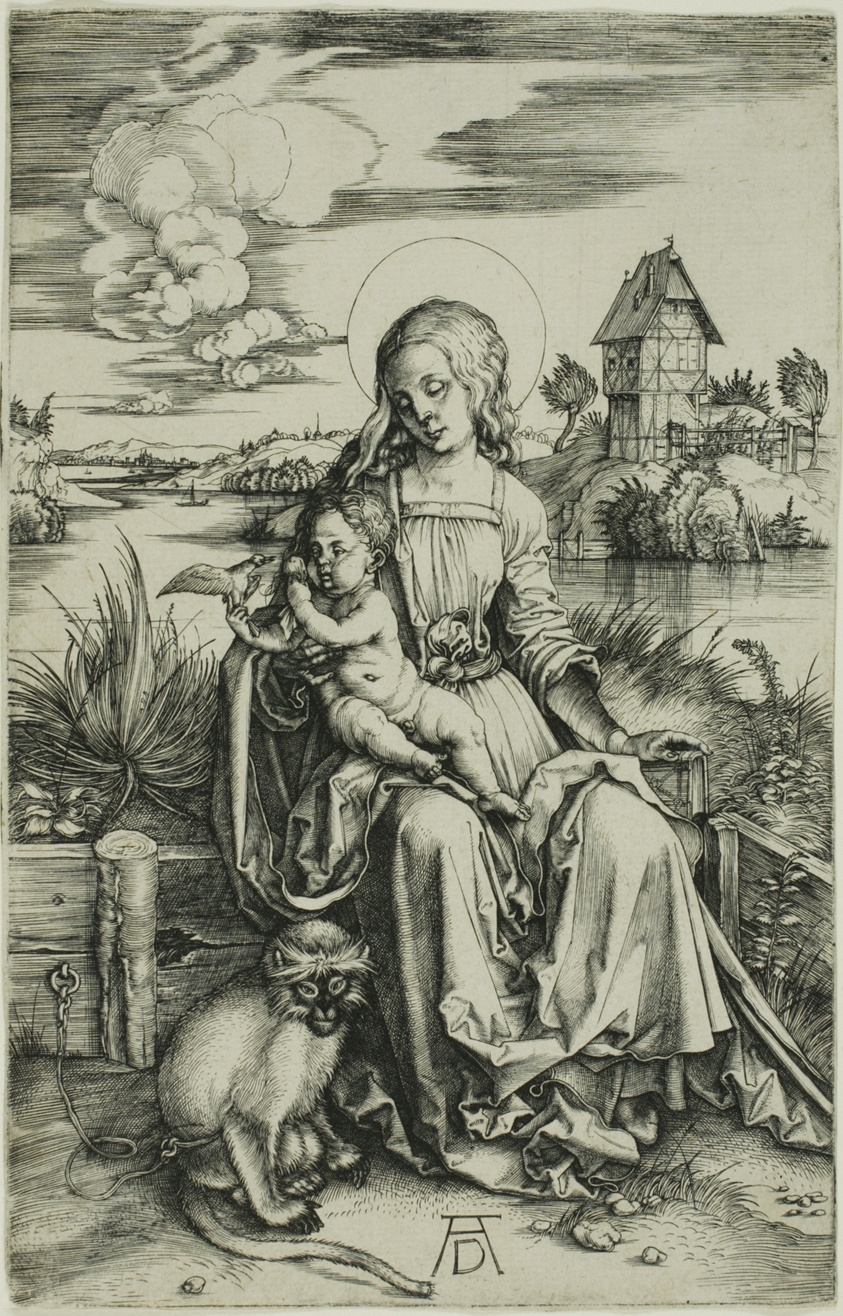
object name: Print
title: Madonna with the Monkey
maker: Albrecht Dürer (German, 1471-1528)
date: c. 1498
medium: Engraving in black on ivory laid paper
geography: Germany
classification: engraving; print; prints and drawing; paper